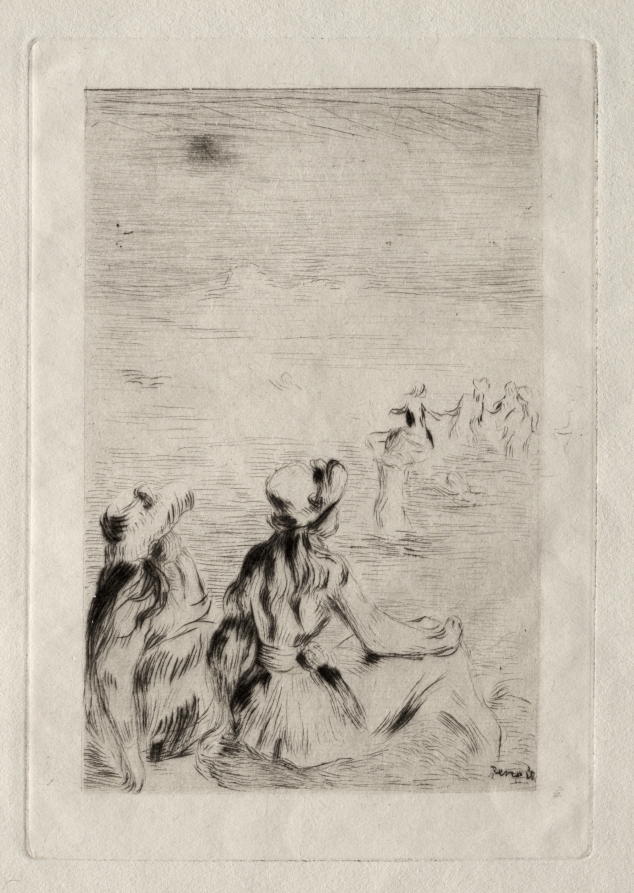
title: On the Beach at Berneval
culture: France, late 19th-early 20th century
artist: Pierre-Auguste Renoir (French, 1841–1919)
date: c. 1892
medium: etching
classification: Print